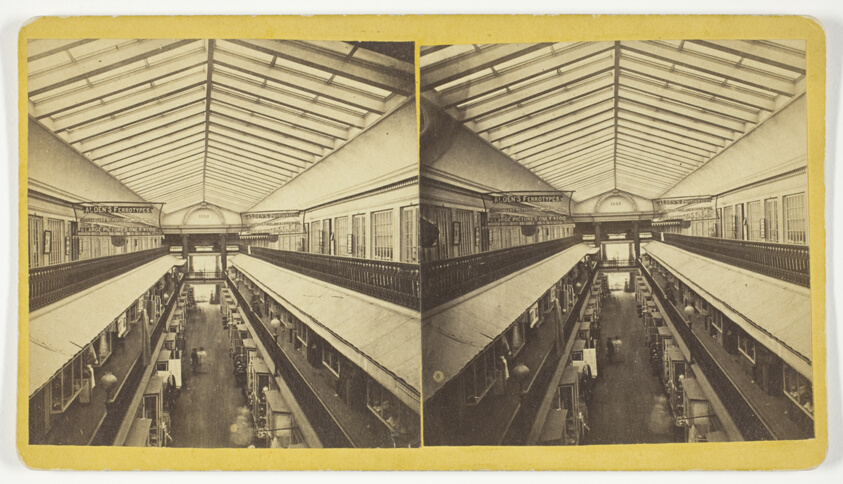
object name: Photograph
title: Interior of Arcade, Providence, R.I.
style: 19th century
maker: Artist unknown; American, late 19th century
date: 1875/99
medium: Albumen print, stereo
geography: Providence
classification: photography; photograph